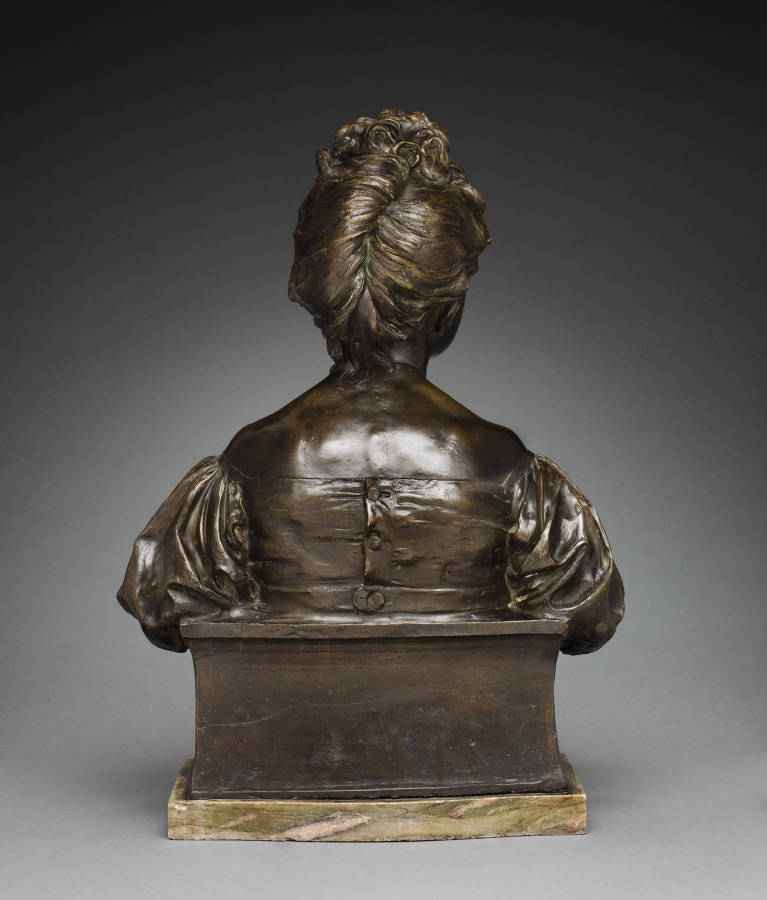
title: The Age of Innocence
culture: England, 19th century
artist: Alfred Drury (British, 1856–1944)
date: 1897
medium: bronze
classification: Sculpture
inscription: signed and dated: A. DRURY 97.